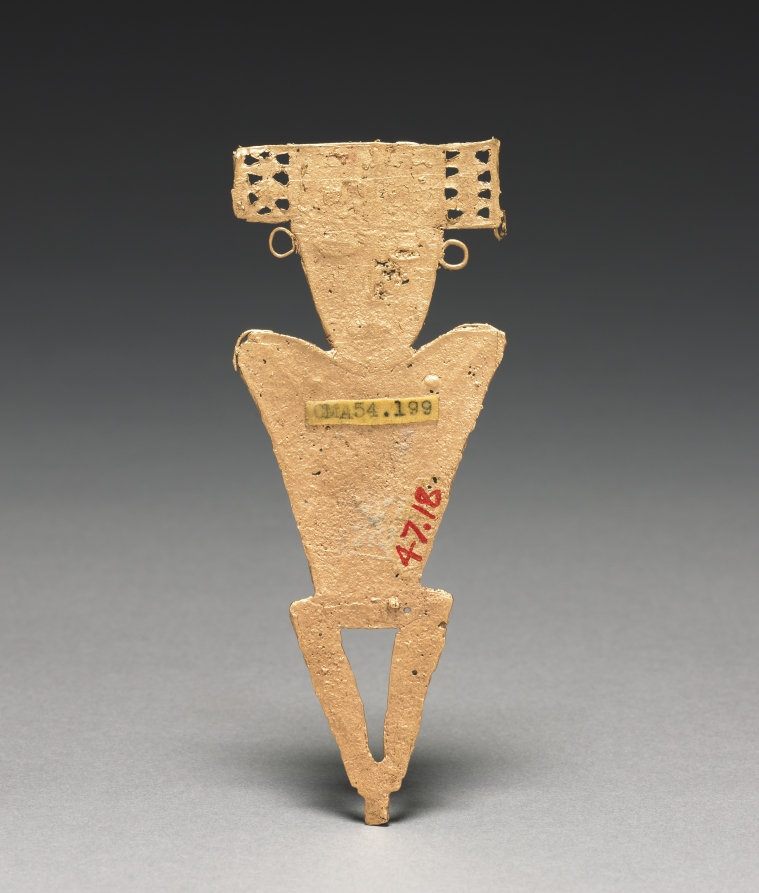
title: Tunjos (Votive Offering Figurine)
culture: Colombia, Muisca style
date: c. 900–1550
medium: cast gold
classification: Metalwork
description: Unlike the other gold ornaments made in the isthmian region, tunjos were not worn; instead, they served as offerings that were deposited in sacred places such as lagoons and caves. They often depict humans who hold something. Perhaps because they were not meant for display, tunjos were not finished after lost-wax casting. Flaws remain uncorrected, surfaces are unpolished, and gold that backed into the channel used to pour the molten metal into the mold was left in place.